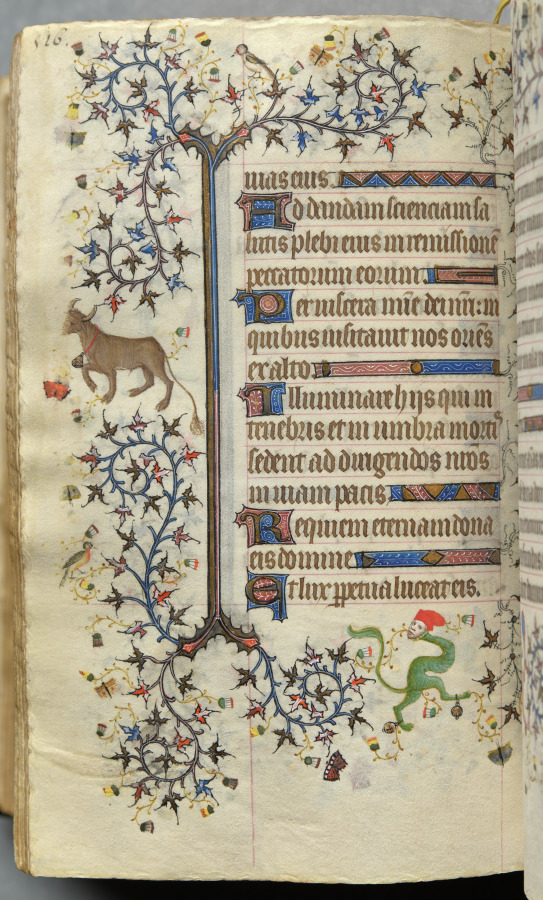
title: Hours of Charles the Noble, King of Navarre (1361-1425): fol. 252v, Text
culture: France, Paris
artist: Master of the Brussels Initials and Associates (French)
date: c. 1405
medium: ink, tempera, and gold on vellum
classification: Bound Volume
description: This precious volume was obviously highly prized by its owner, the French-born King of Navarre, who had his coat of arms painted on no less than twenty folios. Rather than directly commissioning this manuscript from a specific workshop, it seems that Charles the Noble acquired his book of hours -- perhaps ready-made for the luxury market -- while on a trip to Paris in 1404-05. A collaborative effort, six painting styles are evidenced within the pages of this codex, those of two Italians, two Frenchmen, and two Netherlanders. The painter who was responsible for the planning and decoration of the book, and who produced seventeen of the large miniatures, was a Bolognese artist known as the Master of the Brussels Initials. His principal assistant, responsible for most of the borders, was a Florentine who signed his name "Zecho" da Firenze on folio 208 verso.